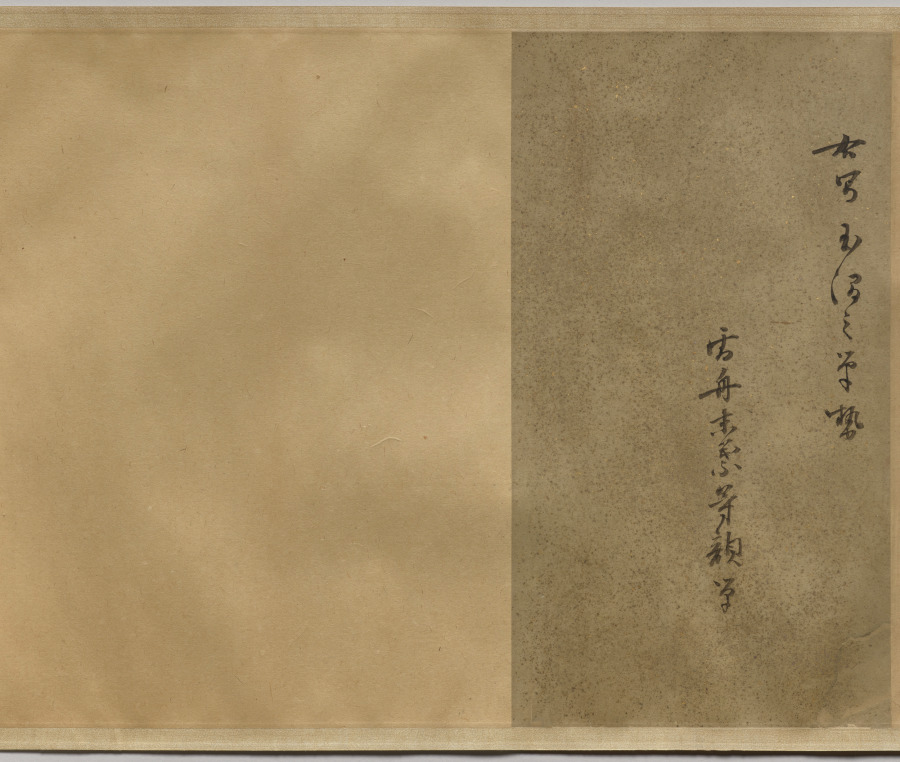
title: Poems and Pictures of the Eight Views of Xiao-Xiang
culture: Japan, Momoyama period (1573–1615)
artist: Unkoku Tōgan (Japanese, 1547–1618)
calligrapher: Inkei Gentetsu (Japanese, 1562–1612)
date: 1605–12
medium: Handscroll; ink on paper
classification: Painting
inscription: Each painting sealed with red gourd-shaped seal reading Unkoku (雲谷) and a square seal reading Tōgan (等顔).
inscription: Each painting prefaced with a titled poem on the Eight Views of Xiao-Xiang by Yujian Ruofen (active late 13th century) inscribed by Japanese Buddhist monk Inkei Gentetsu (1562–1612).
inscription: 右寫玉㵎之筆勢／雪舟末葉等顔筆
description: Unkoku Tōgan brushed these scenes using the splashed-ink technique associated in Japan with the Chinese monk Yujian Ruofen (active late 1200s). Xiao-Xiang refers to the region in present-day Hunan province, where the Xiang River and its tributaries converge. Each of the eight views evokes a time of day or season. The earliest surviving series of Xiao-Xiang paintings is by Wang Hong (active mid-1100s), but textual evidence tells us the theme appears earlier. It was later adopted in Japan and Korea, as seen here. The poems were inscribed by Inkei Gentetsu, the third abbot of the Rinzai Zen temple Tōshunji, Japan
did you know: The “Tō” of Tōgan comes from the name of painter Sesshū Tōyō (1420–1506).